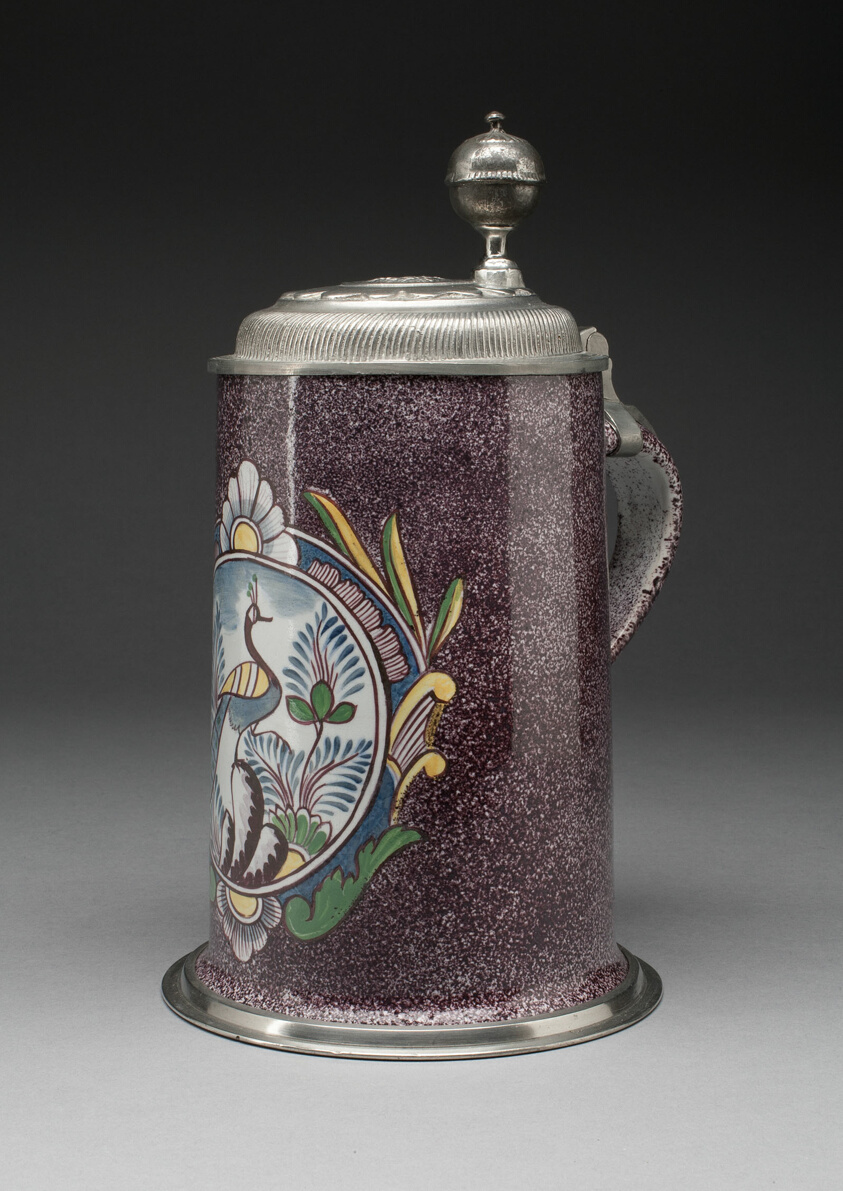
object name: Ceramics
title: Tankard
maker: Germany, Nuremberg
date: Mid 18th century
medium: Tin-glazed earthenware (faience) and pewter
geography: Nuremberg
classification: drinking vessel; european decorative arts; ceramics